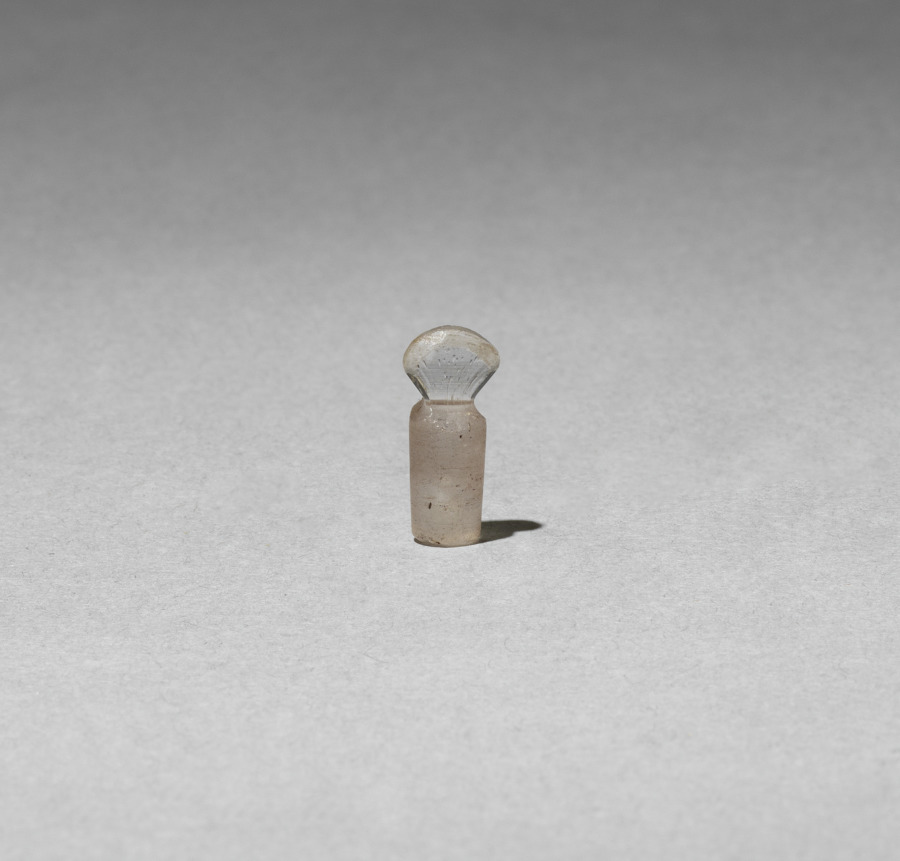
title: Stopper for a Scent Bottle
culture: France, 19th century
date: 1850–1870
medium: glass with enameled silver mounts, partially gilt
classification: Miscellaneous